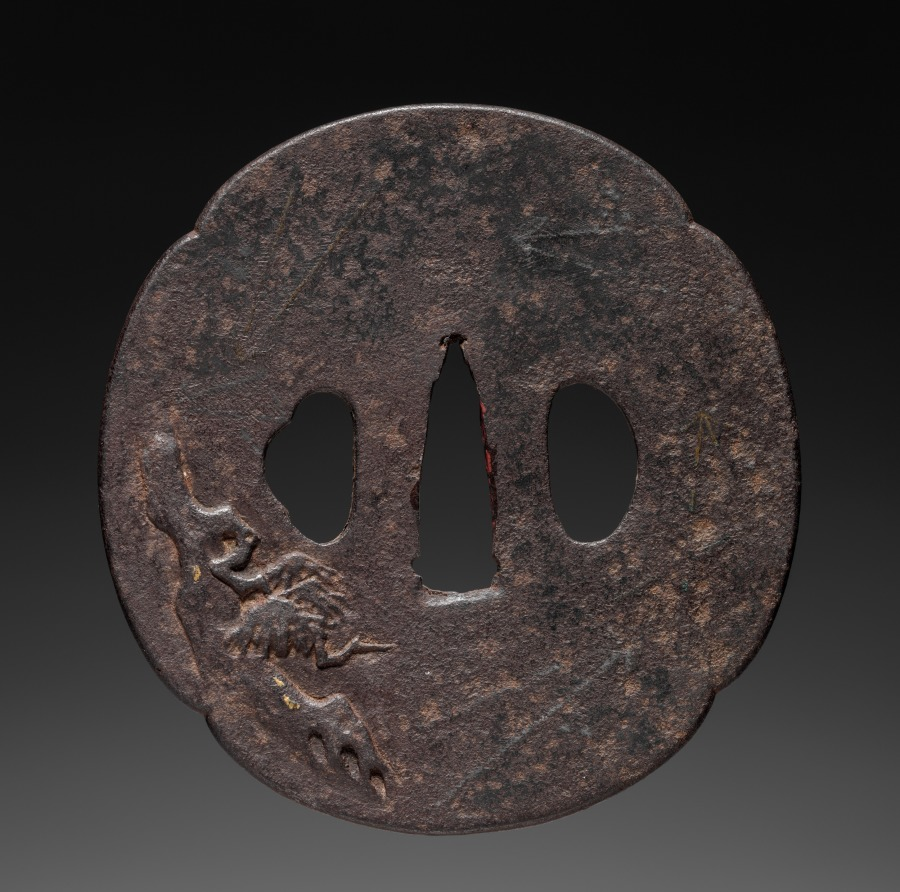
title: Sword Guard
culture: Japan, Edo period (1615–1868)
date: late 1600s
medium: iron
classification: Arms and Armor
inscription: Signature: Kaneiye residing at Fushimi, Yamashiro province